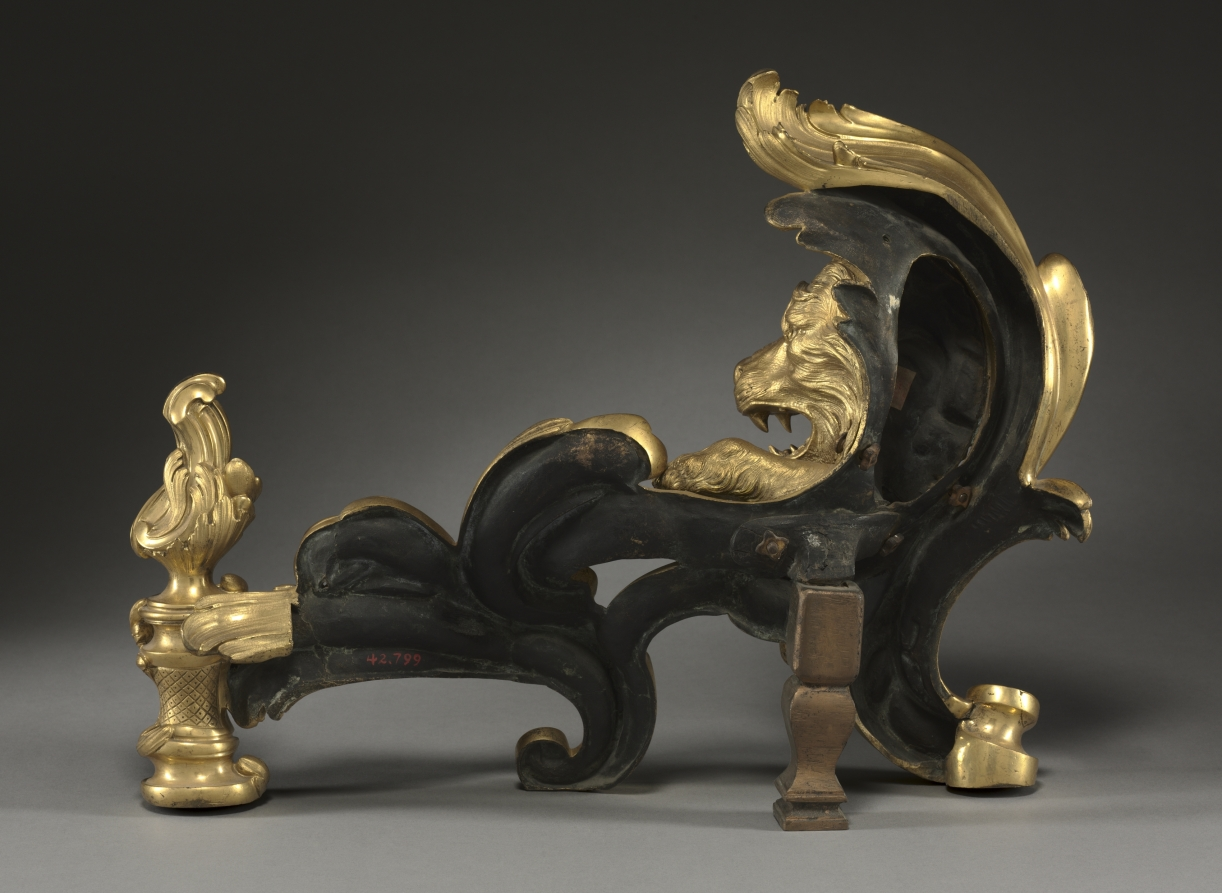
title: Firedog (1 of 2)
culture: France, 18th century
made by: Jacques Caffieri (French, 1678–1755)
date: 1752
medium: gilt bronze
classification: Furniture and woodwork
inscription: signed: Caffieri, 1752.